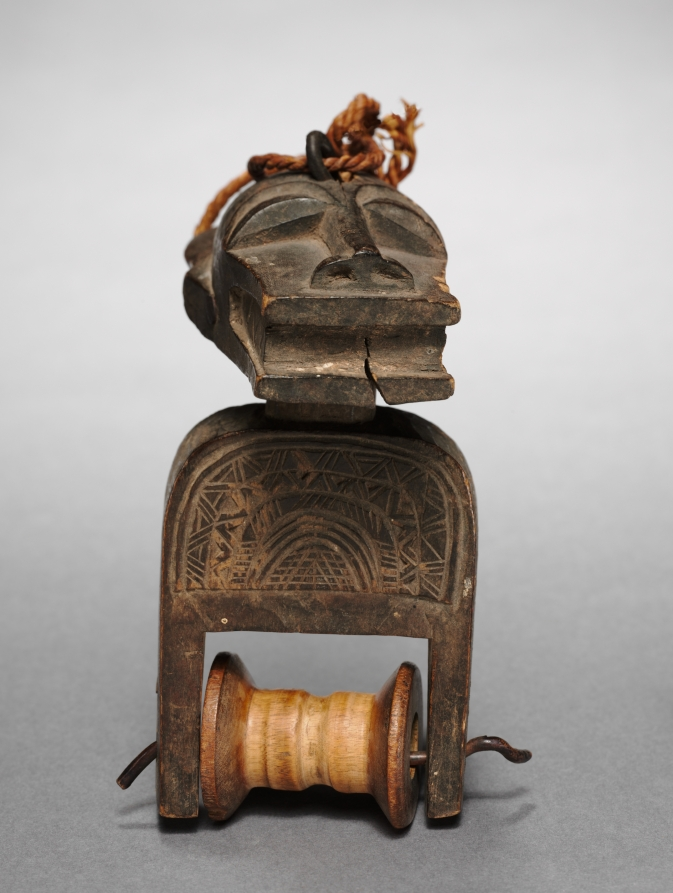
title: Heddle Pulley (Bo Nun Amuin mask)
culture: Africa, West Africa, Côte d’Ivoire, Baule-style carver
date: 1900s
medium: Wood, metal, and plant fiber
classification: Implements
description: The heddle pulley, a working element of a narrow-band loom, bears a miniature sculpture. Heddle pulleys support and separate threads during weaving. Mounted above the weaver, the pulleys allow him to glance up at an object of inspiring beauty, rather than pure functionality. This pulley depicts a face mask, a secular usage of a typically sacred mask type.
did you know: This heddle pulley depicts a fearsome Bo Nun Amuin mask that recalls nature spirits.